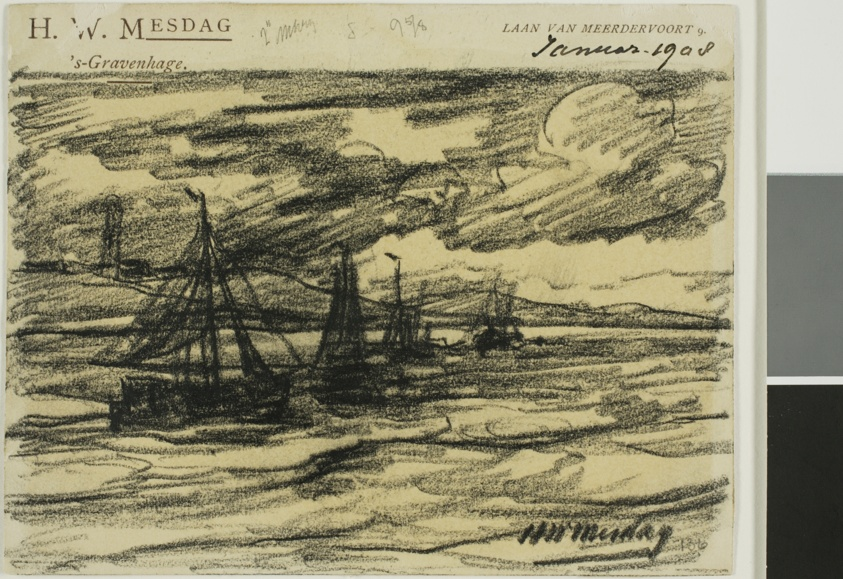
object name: Drawing and Watercolor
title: Ships at Sea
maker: Hendrik Willem Mesdag (Dutch, 1831-1915)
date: 1908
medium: Black crayon on cream card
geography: Netherlands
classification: drawings (visual works); prints and drawing